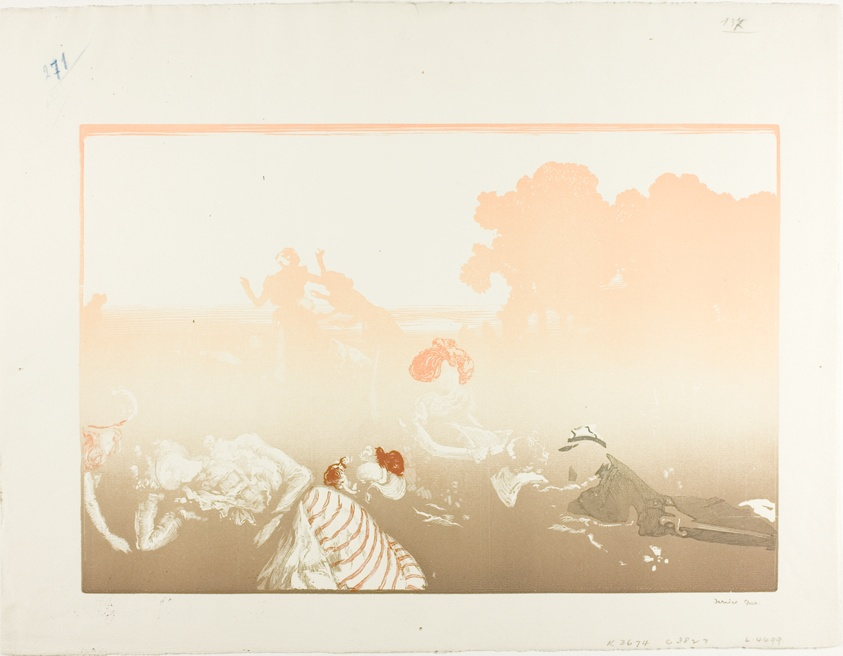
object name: Print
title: Modern Bucolic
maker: Louis Auguste Lepère (French, 1849-1918); commissioned by and final state published by Graphischen Künste (Austrian, active 19th-20th centuries)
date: 1901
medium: Woodcut in peach, fawn, brown, olive-brown and red-brown on cream laid paper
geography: France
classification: woodcut; print; prints and drawing